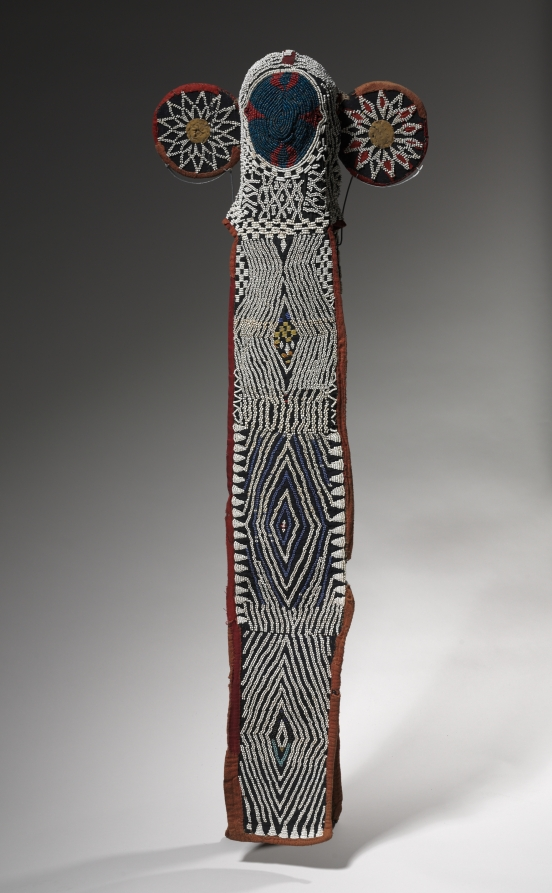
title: Mask (mbap mteng): Elephant (aka)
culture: Africa, Central Africa, Cameroon, Grassfields region, Bamileke-style maker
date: early 1900s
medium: Cotton, burlap, glass beads, twine, leather, and wood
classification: Mask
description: The name given to masks like this, mbap mteng, means "animal with huge ears." In the Cameroon Grassfields kingdoms, the elephant signifies power, authority, prestige, and leadership. The colorful glass beads that decorate the mask’s surface were imported from Venice and Bohemia (in Europe) and signal wealth and prosperity. Its geometric patterns include triangles that evoke the leopard, another animal linked with royal power. Members of Kuosi, an elite male society, wore such elephant masks for ritual dances and funerary ceremonies. This mask would have been worn with a costume that included a feather headdress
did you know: Performers wore elephant masks with indigo-dyed robes, red feather headdresses, and leopard pelts. Leopards and elephants symbolized royal power.